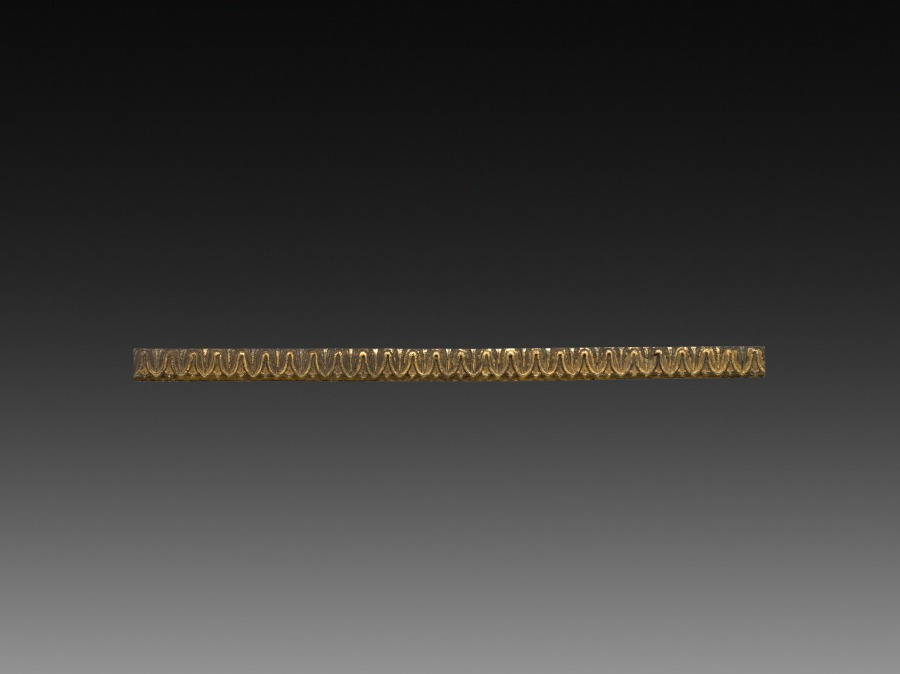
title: Ornamental Detail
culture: France, late 18th century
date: late 1700s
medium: gilt bronze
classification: Metalwork